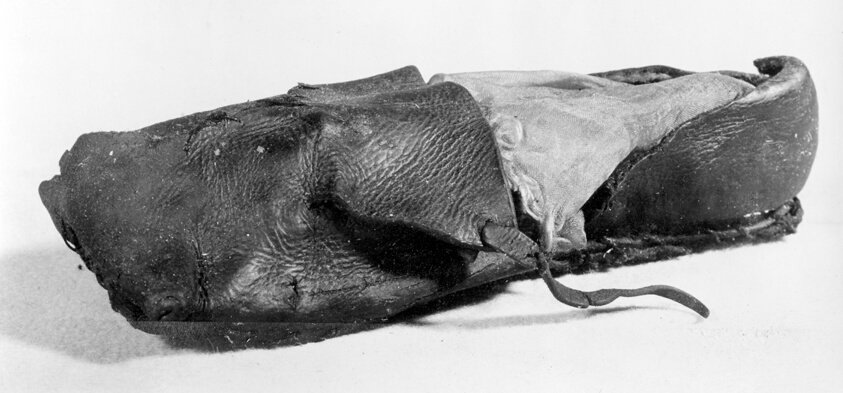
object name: Costume and Accessories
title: Child's Shoe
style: tudor, european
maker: England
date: 16th century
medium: Leather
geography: England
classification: textile; costume accessory - shoe; shoes - misc; costume; dress (garment); clothing